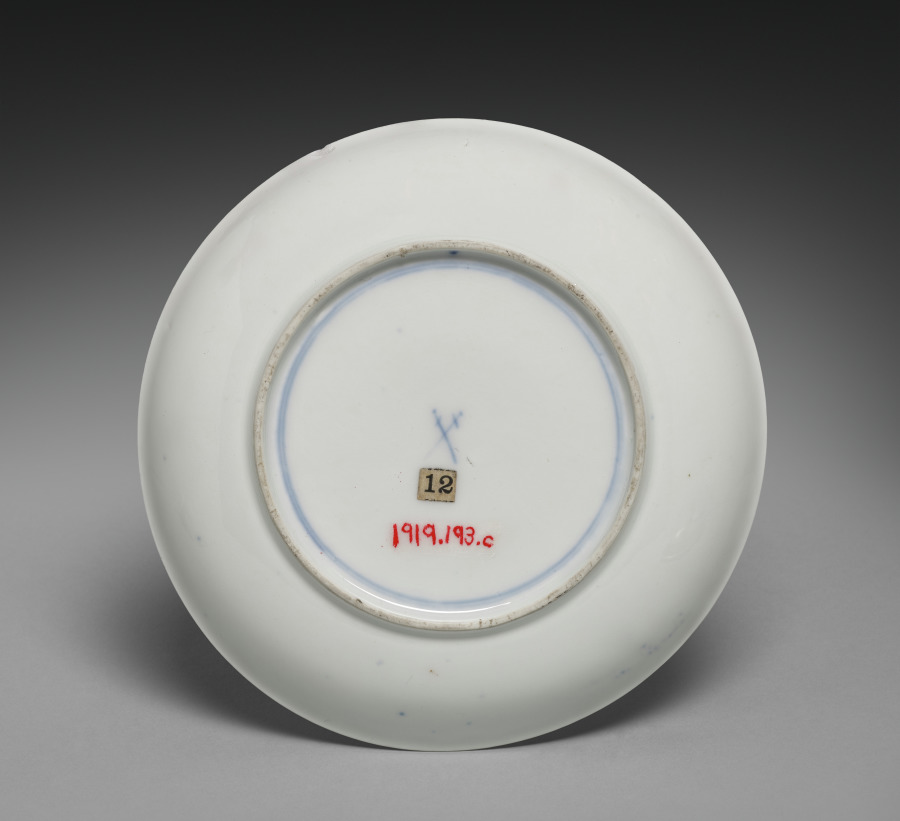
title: Stand for a Covered Broth Bowl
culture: Germany, Meissen, 18th century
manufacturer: Meissen Porcelain Factory (German, est. c. 1710)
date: 1730–40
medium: gilt porcelain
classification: Ceramic